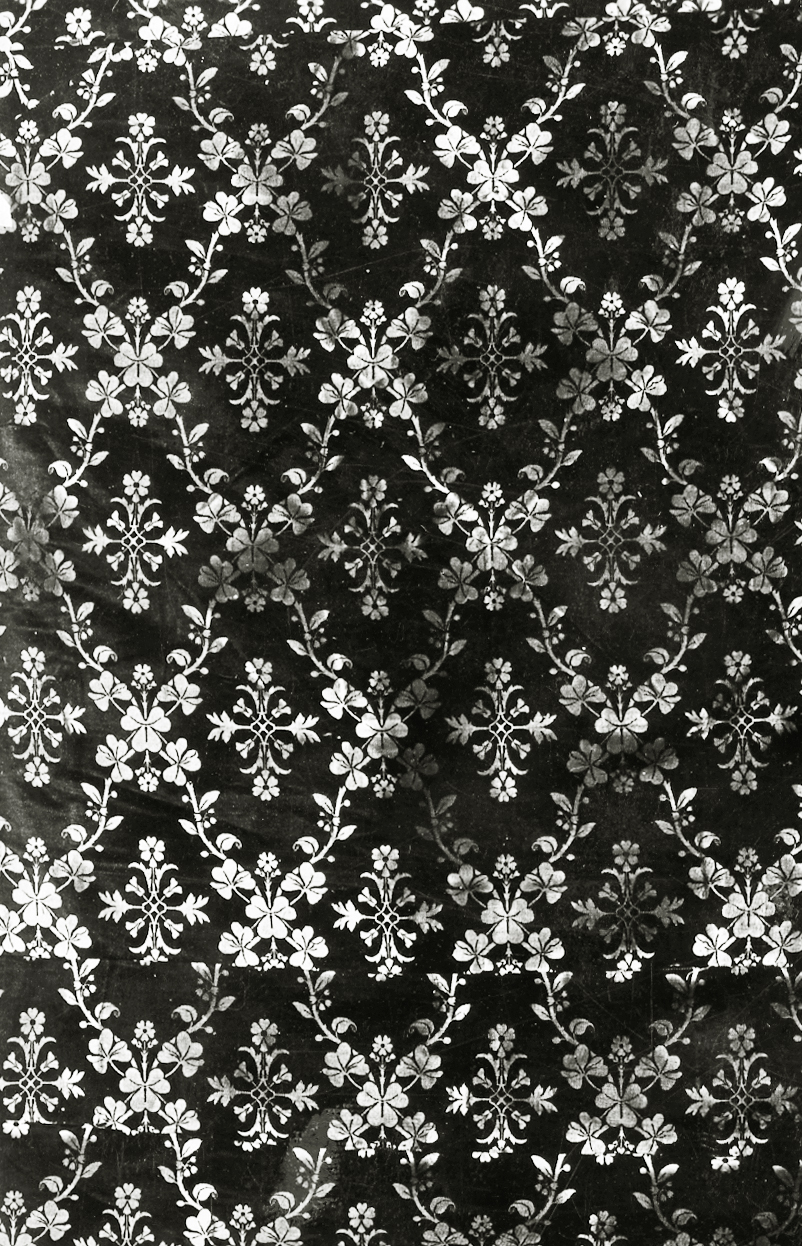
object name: Textile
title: Panel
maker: England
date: 19th century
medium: Silk, warp-float faced satin weave with supplementary patterning wefts tied by supplementary binding warps in twill interlacings (lampas)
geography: England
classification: textile; weaving